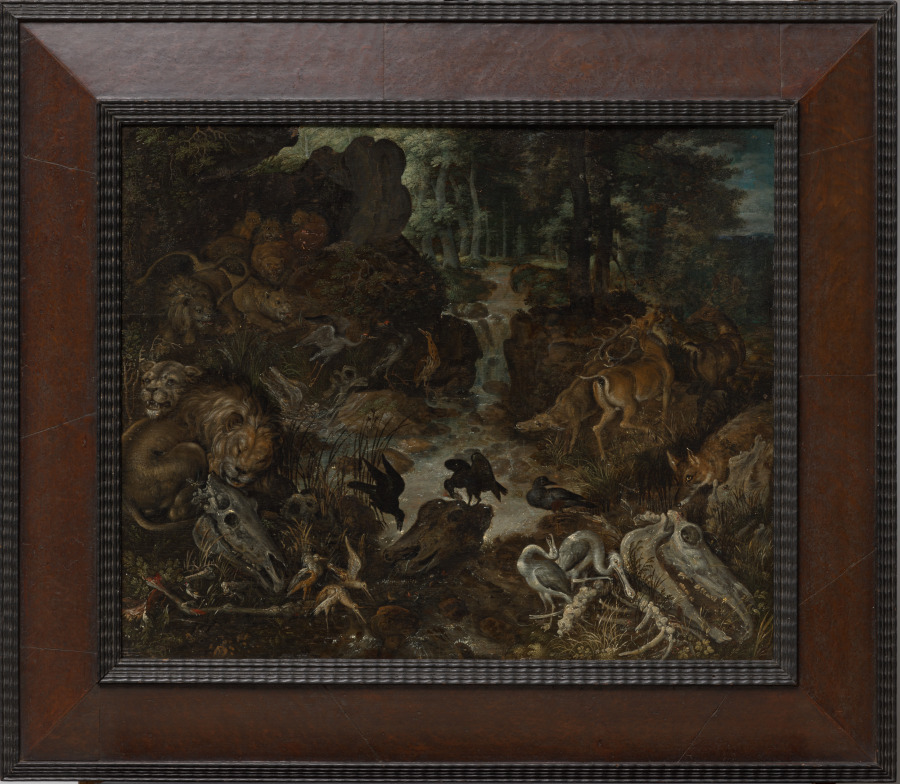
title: Lions and Fox in a Rugged Landscape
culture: Dutch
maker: Roelant Savery (Flemish, 1576–1639)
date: 1576–1637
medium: Oil on panel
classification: Painting